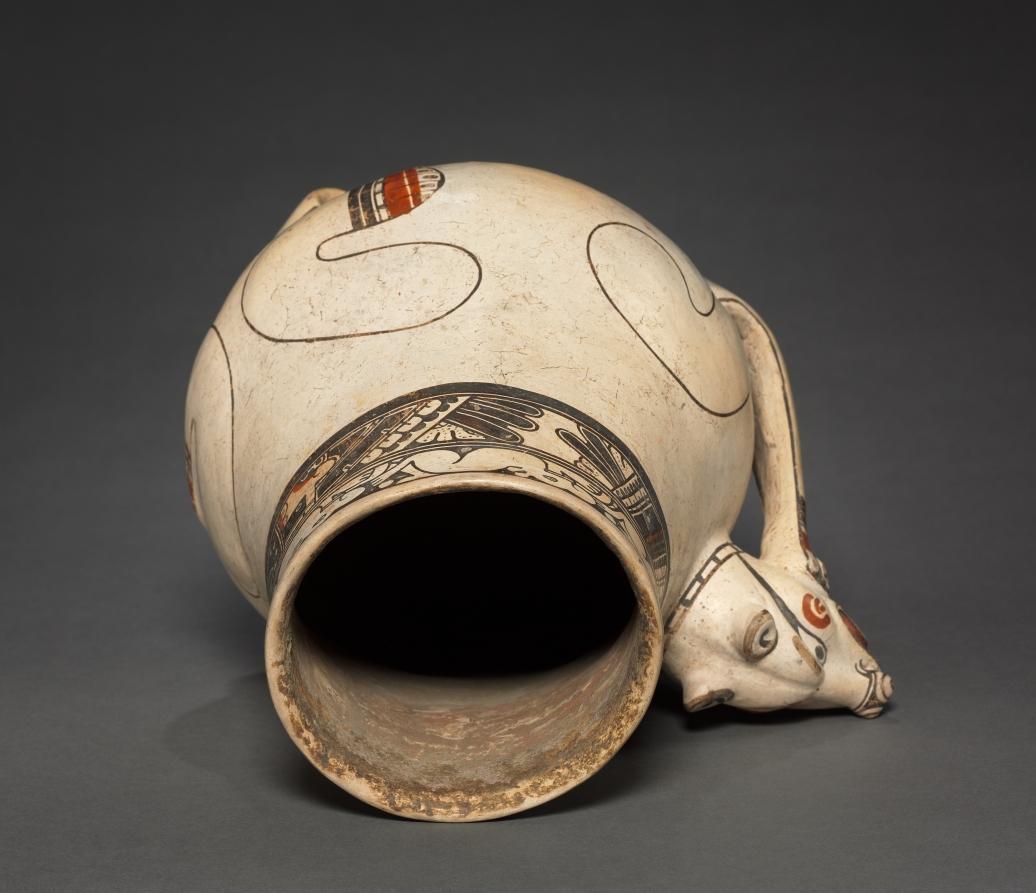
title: Animal Effigy Vessel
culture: Costa Rica, Southern Nicoya region, Pataky Polychrome style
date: 1000–1550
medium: earthenware with colored slips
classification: Ceramic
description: The Pataky style excells in animal portrayals that combine a modeled head with a flat vessel chamber that doubles as the animal’s body. It may be important that many of these animals strike human poses; creatures that combine the human and animal often have mythic import.